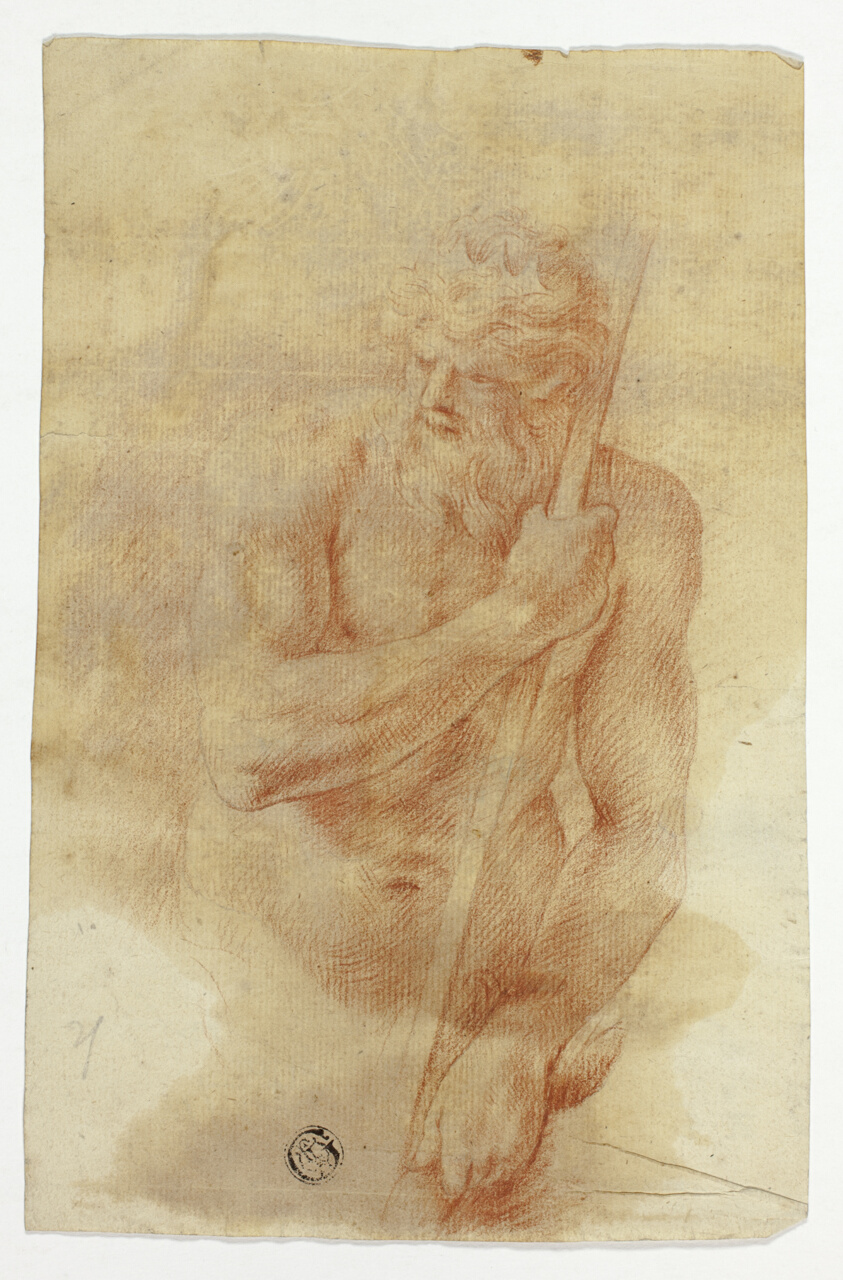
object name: Drawing and Watercolor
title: Neptune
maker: Unknown Artist; French, 1600-1699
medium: Red chalk on ivory laid paper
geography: France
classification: graphite; drawings (visual works); prints and drawing